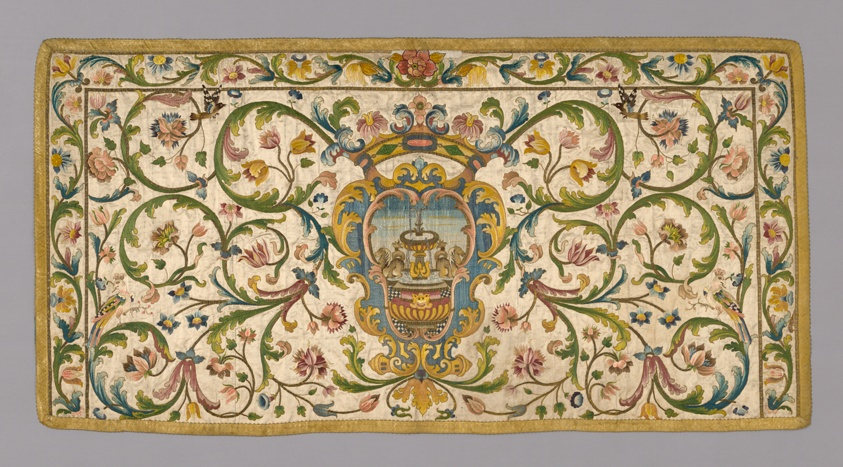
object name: Religious/Ritual Object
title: Altar Frontal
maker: Italy or France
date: 18th century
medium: Silk, satin weave; underlaid with hemp, plain weave; embroidered with silk, gilt-metal-strip-wrapped silk, and and hemp wrapped with gilt-metal strip and silk in satin stitches; laid work and couching; edged with woven tape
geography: Italy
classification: textile; needlework (visual works); liturgical; ritual objects